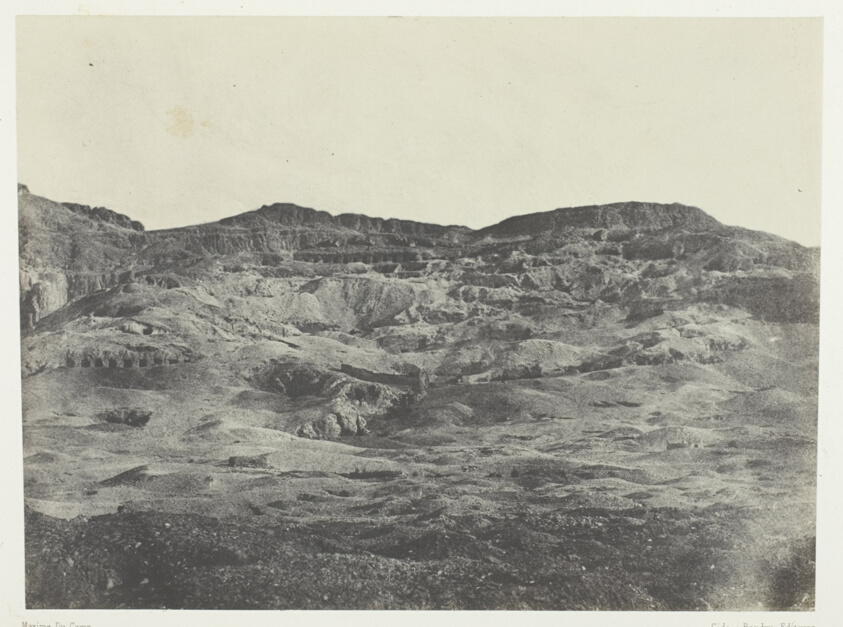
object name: Photograph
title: Gournah, Nécropole de Thèbes; Thèbes, plate 60 from the album "Egypte, Nubie, Palestine et Syrie" (1852)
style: 19th century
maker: Maxime Du Camp (French, 1822–1894)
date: 1849/51, printed 1852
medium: Salted paper print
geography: France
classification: salted paper print; photographic process; photography; photograph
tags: Collected by Hugh Edwards, Egypte, Nubie, Palestine et Syrie